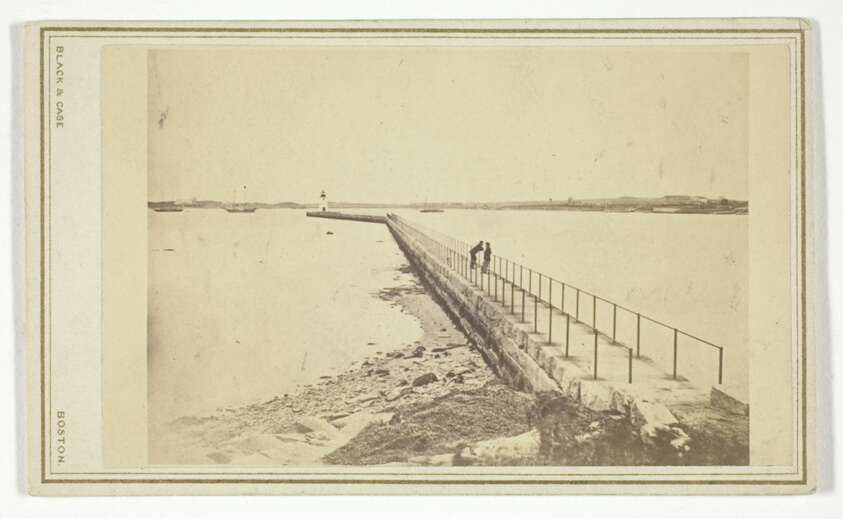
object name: Photograph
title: Goat Island, Lighthouse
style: 19th century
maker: Black & Case (active 1864–67); James Wallace Black (American, 1825–1896)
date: 1864/67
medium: Albumen print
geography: United States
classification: photographic process; photography; card photographs; photograph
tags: Collected by Hugh Edwards